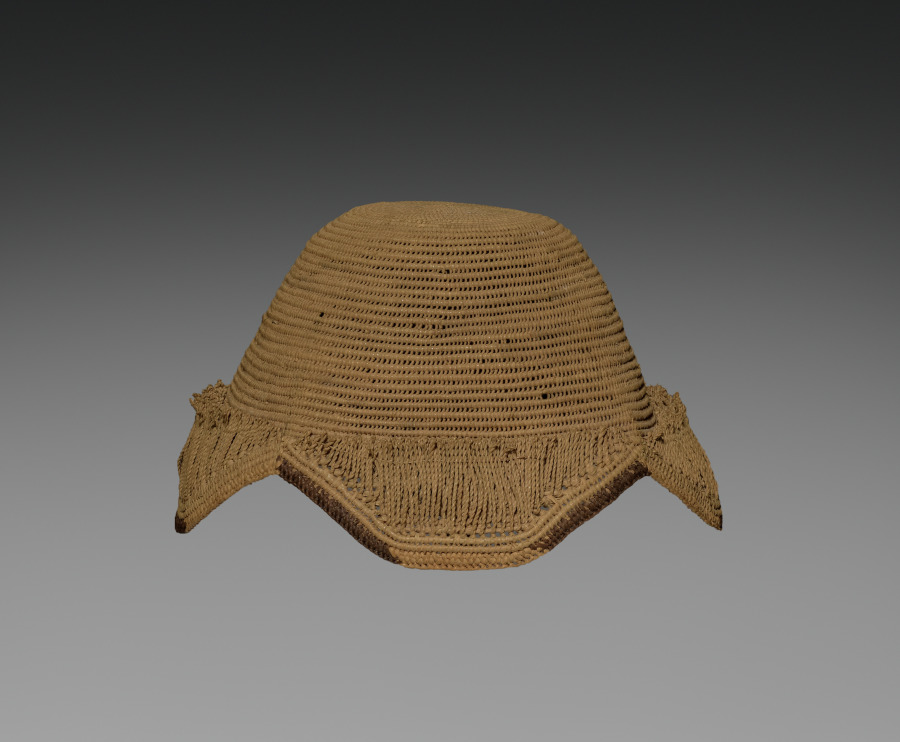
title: Hat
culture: Africa, Central Africa, Democratic Republic of the Congo, Kuba-style maker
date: early 1900s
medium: Raffia and dye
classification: Garment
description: Titled Kuba men and prominent women wear the laket, a small ornate dome-shaped hat. An essential fashion item of adult men in good social standing, it focuses special attention on the head as a significant marker of individual identity, ethnic affiliation, status, and role in society. This prestige object is secured on the crown of the head with a nine-and-a-half-inch metal pin that pierces through the hat onto a clump of hair. The laket is made from undyed raffia palm fiber that was then coiled into threads and woven. There are two examples of the laket: the plain type with the flat top, and the more elaborate type called the laket mishiing.